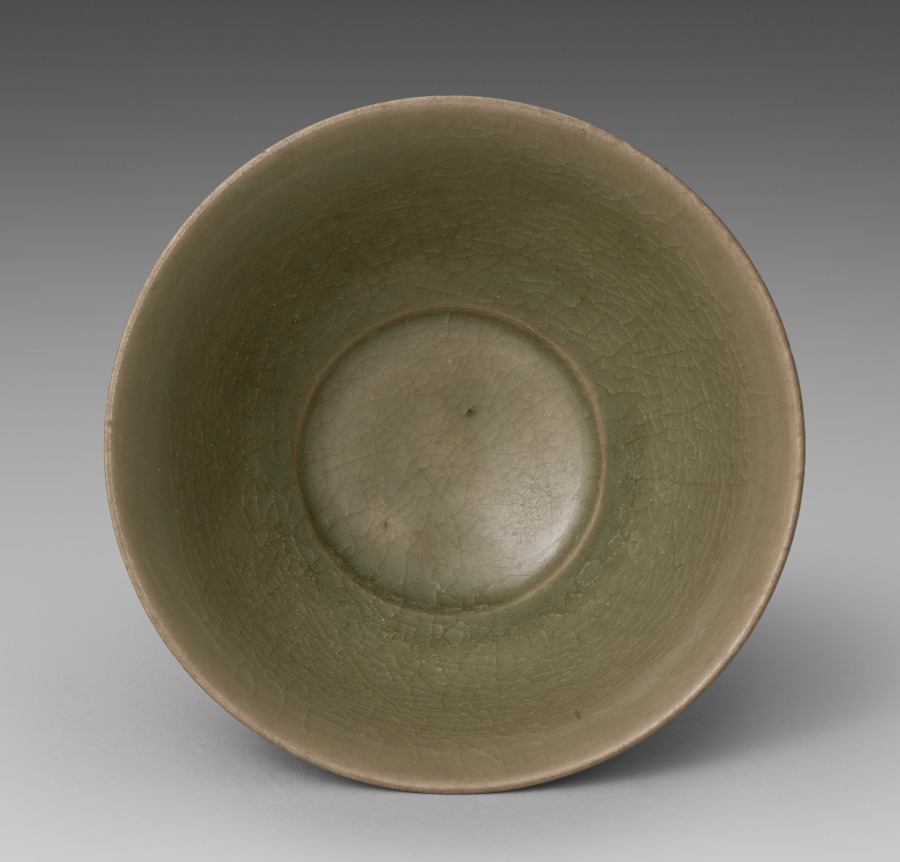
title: Bowl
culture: China, Northern Song dynasty (960–1127)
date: 1000s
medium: glazed stoneware; Northern Celadon ware, Yaozhou type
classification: Ceramic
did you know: Overlapping lotus petals cover the exterior walls of this deep bowl.